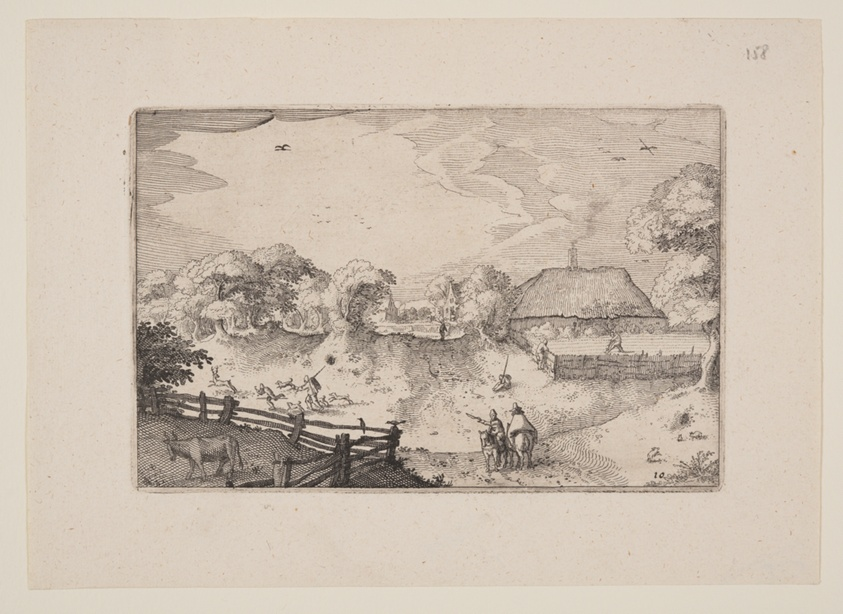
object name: Print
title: Road Near the Dunes, from Views in the Surroundings of Haarlem (Plaisante Plaetsen)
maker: Claes Jansz. Visscher (Netherlandish, c. 1550–c. 1612)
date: 1610/20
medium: Etching on ivory laid paper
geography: Netherlands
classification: print; paper; prints and drawing; etching